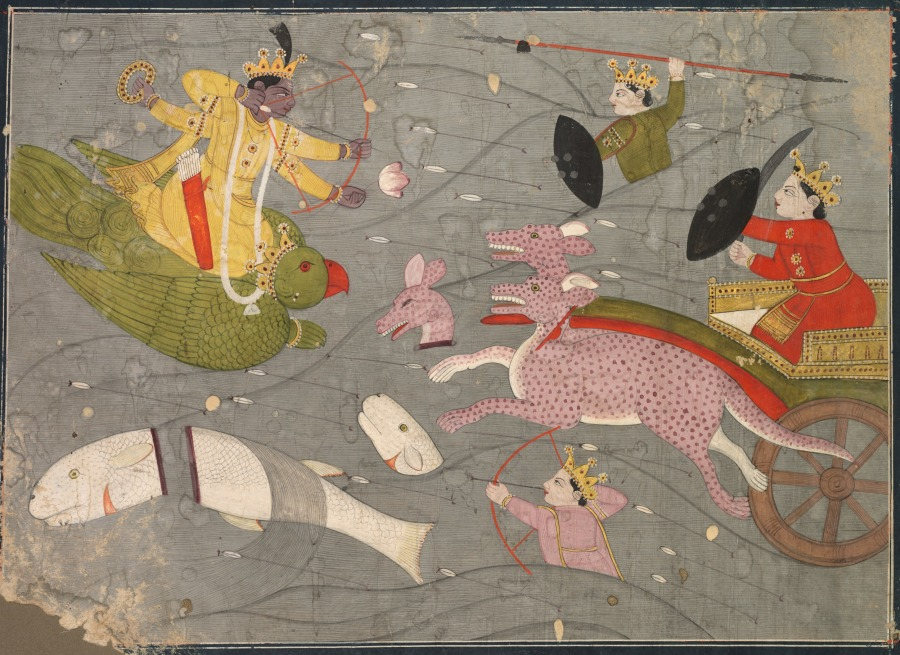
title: Krishna fighting the sons of King Bana, from an Usha-Aniruddha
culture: Northern India, Pahari kingdoms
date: c. 1840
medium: Gum tempera and gold on paper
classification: Painting